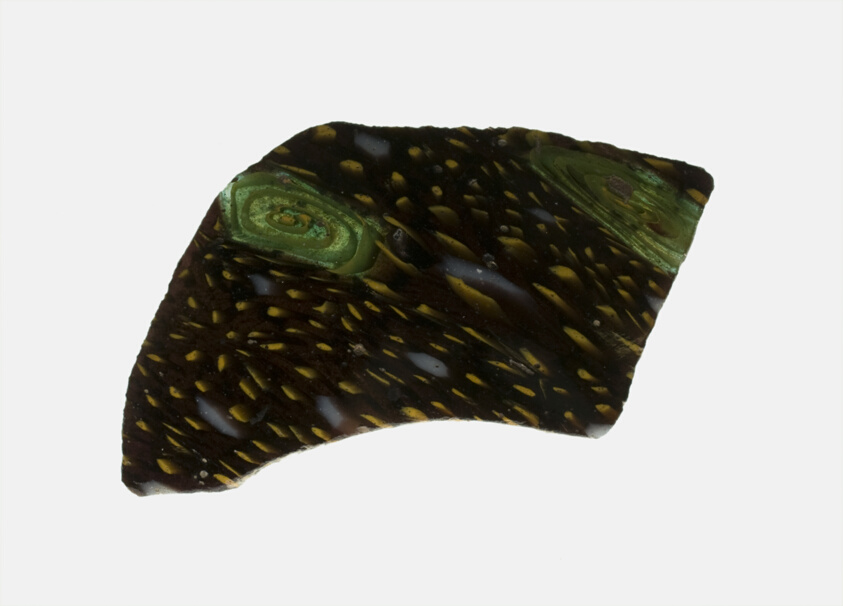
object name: Decorative Arts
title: Fragment of a Bowl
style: roman (ancient, style or period), ancient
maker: Roman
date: 1st century BCE–1st century CE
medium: Glass, mosaic glass technique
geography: Roman Empire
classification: fragment; decorative arts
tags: decoration